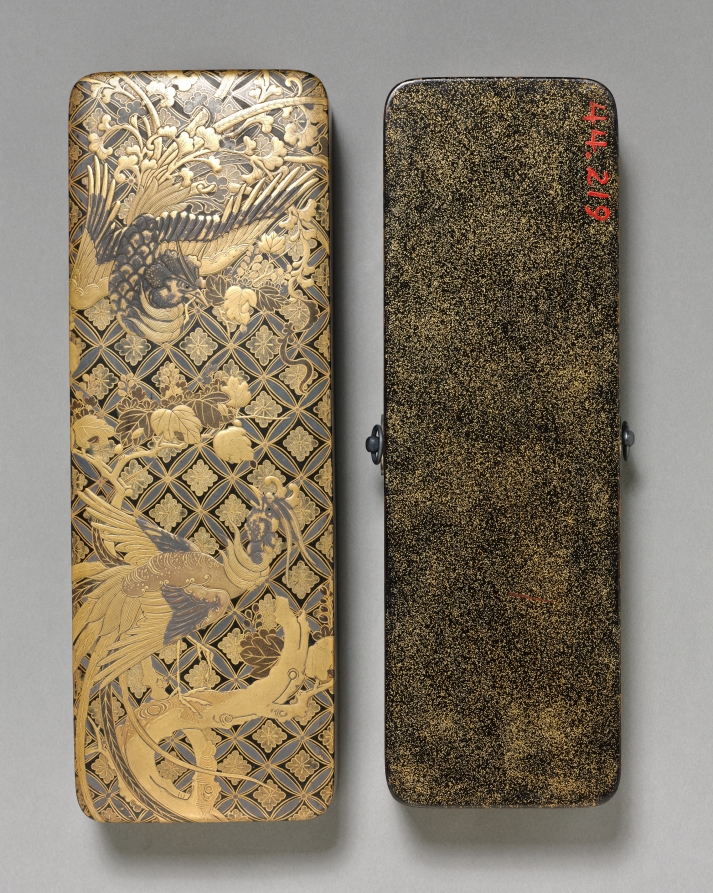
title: Letter Box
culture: Japan, Edo period (1615–1868)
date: 1615–1868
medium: lacquer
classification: Lacquer